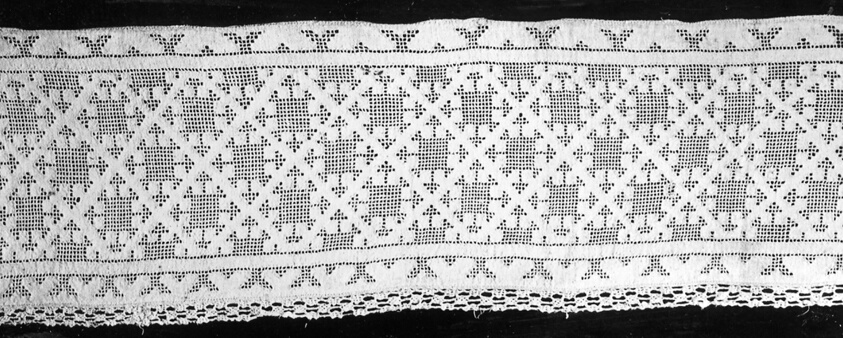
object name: Textile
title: Border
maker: Italy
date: 18th century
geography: Italy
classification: textile; needlework (visual works)